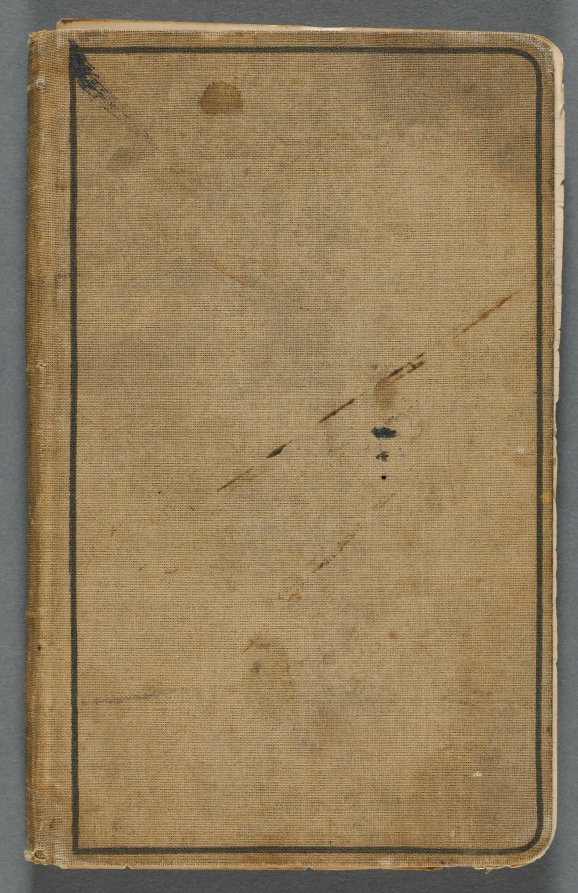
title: Sketchbook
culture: America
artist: Maurice Prendergast (American, born Newfoundland [now Canada], 1858–1924)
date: 1905–10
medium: graphite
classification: Bound Volume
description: This sketchbook contains 69 pages of drawings, a diary largely devoted to the state of the artist's health, and a three-page discourse on the nature of genius and ideas.